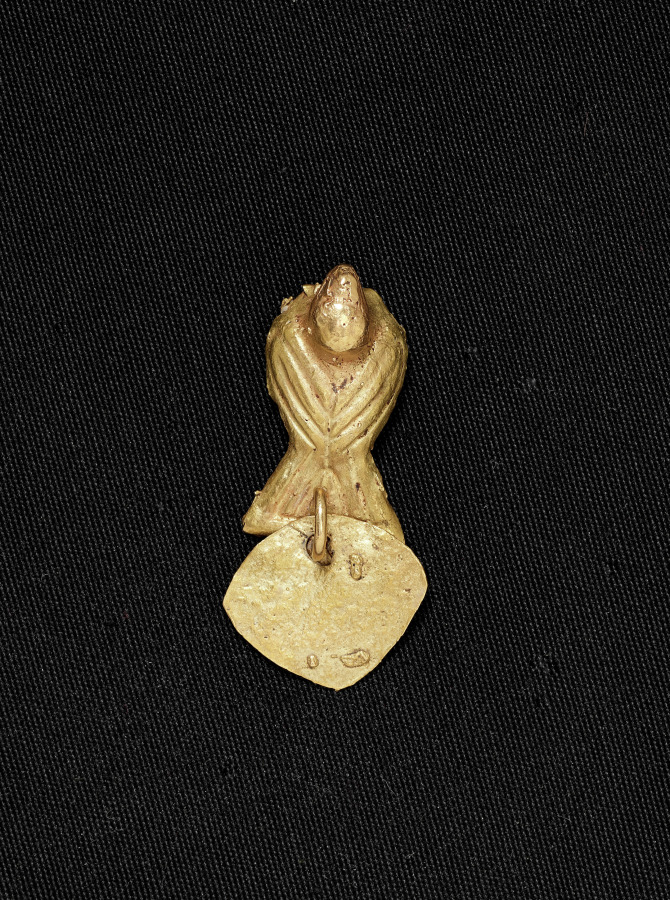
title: Bird Bead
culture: Colombia, Muisca style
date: c. 900–1550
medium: cast gold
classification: Jewelry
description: Muisca metalwork divides into two categories: ornaments to be worn, such as these, and offering figurines, in the case to the right. The elaborate bird pendant features delicate herringbone moldings, openwork patterns, and wing details-all part of the wax model from which the pendant was cast (see nearby computer animation). The dangles were attached after casting.